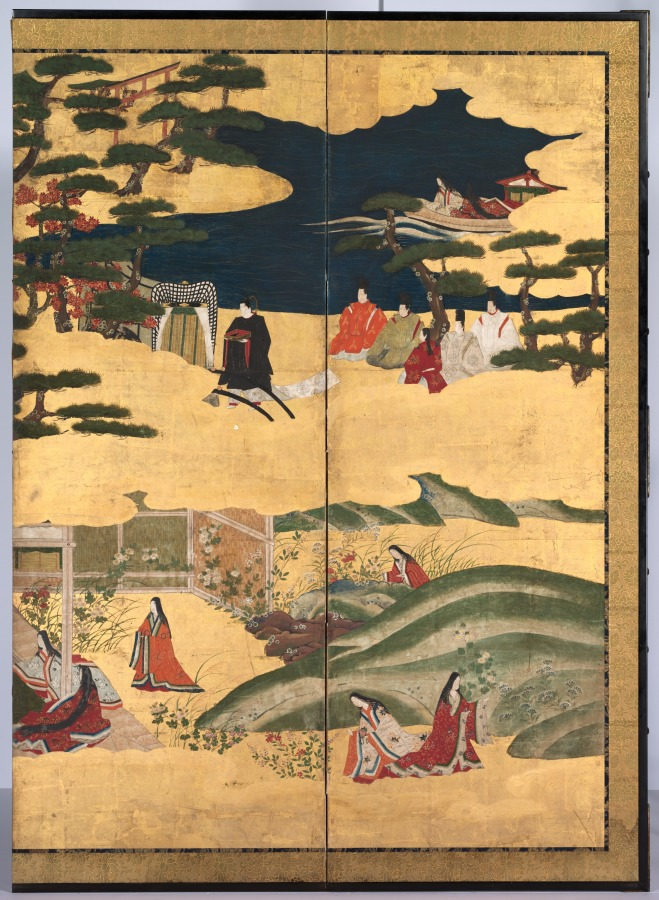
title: Scenes from the Tale of Genji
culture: Japan, Edo period (1615–1868)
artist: Tosa School (Japanese)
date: late 1700s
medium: One of a pair of six-panel folding screens; ink, color, and gold on gilded paper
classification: Painting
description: Folding screens served as temporary dividers in traditional Japanese open-plan architectural spaces. This pair was inspired by Japan’s most celebrated work of literature, the Tale of Genji, written by Murasaki Shikibu, an attendant to the empress in the early 11th-century imperial court. The novel follows the love life of the “Shining Prince” Genji and delves into the psychological states of his many companions. Distinct episodes are nestled within a matrix of golden clouds and landscape elements. Each screen includes six episodes presented in a nonlinear fashion, capturing scattered highlights of the story.